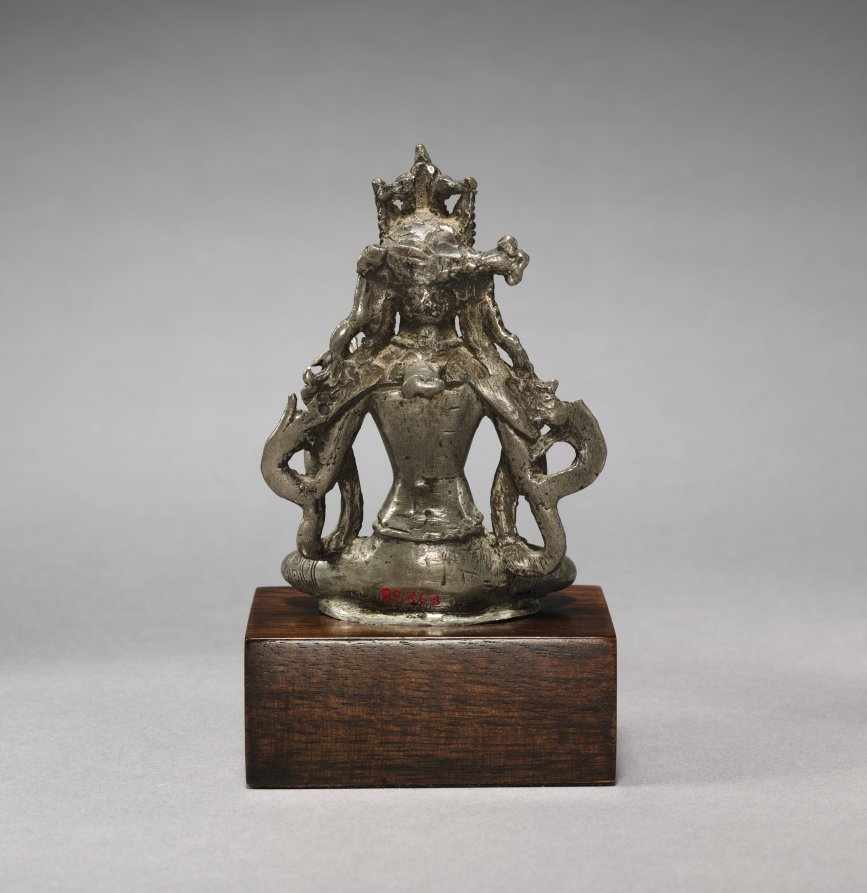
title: Bodhisattva Vajraraksha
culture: Western Tibet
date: c. 900s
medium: silver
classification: Sculpture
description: Once part of a set of sculptures depicting the enlightened beings who occupy a perfect world called the Diamond Realm (Vajradhatu), this figure holds the collar of his jacket in a gesture specific to him. An important practice in Tibetan Buddhism is the visualization of the Diamond Realm as described in texts and aided by artistic representations called mandalas. Bodhisattva Vajraraksha sits in the northern quadrant as a subsidiary figure to the Buddha Amoghasiddhi, who is green in color and quells fear.